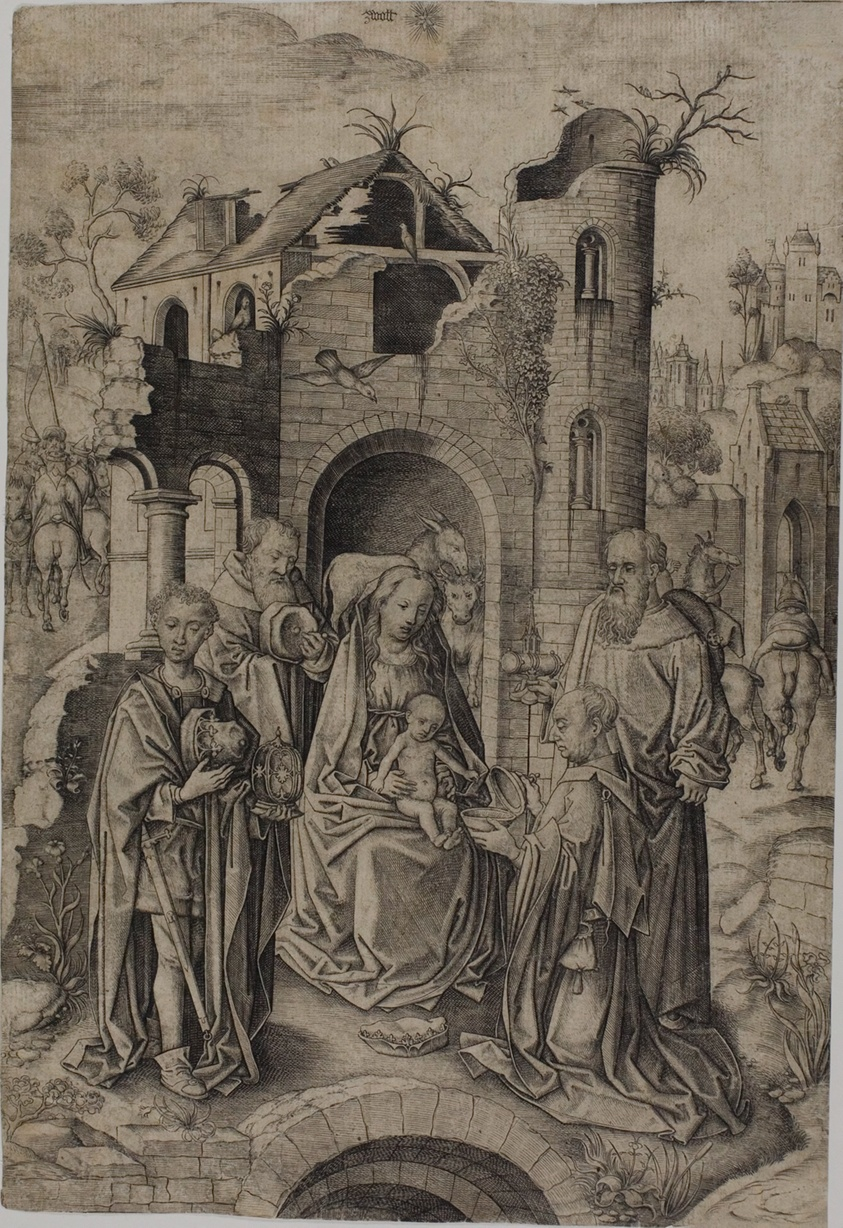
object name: Print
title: The Adoration of the Magi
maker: Master I.A.M. of Zwolle (Netherlandish, active c. 1470-95)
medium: Engraving in black on paper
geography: Netherlands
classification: etching; print; prints and drawing